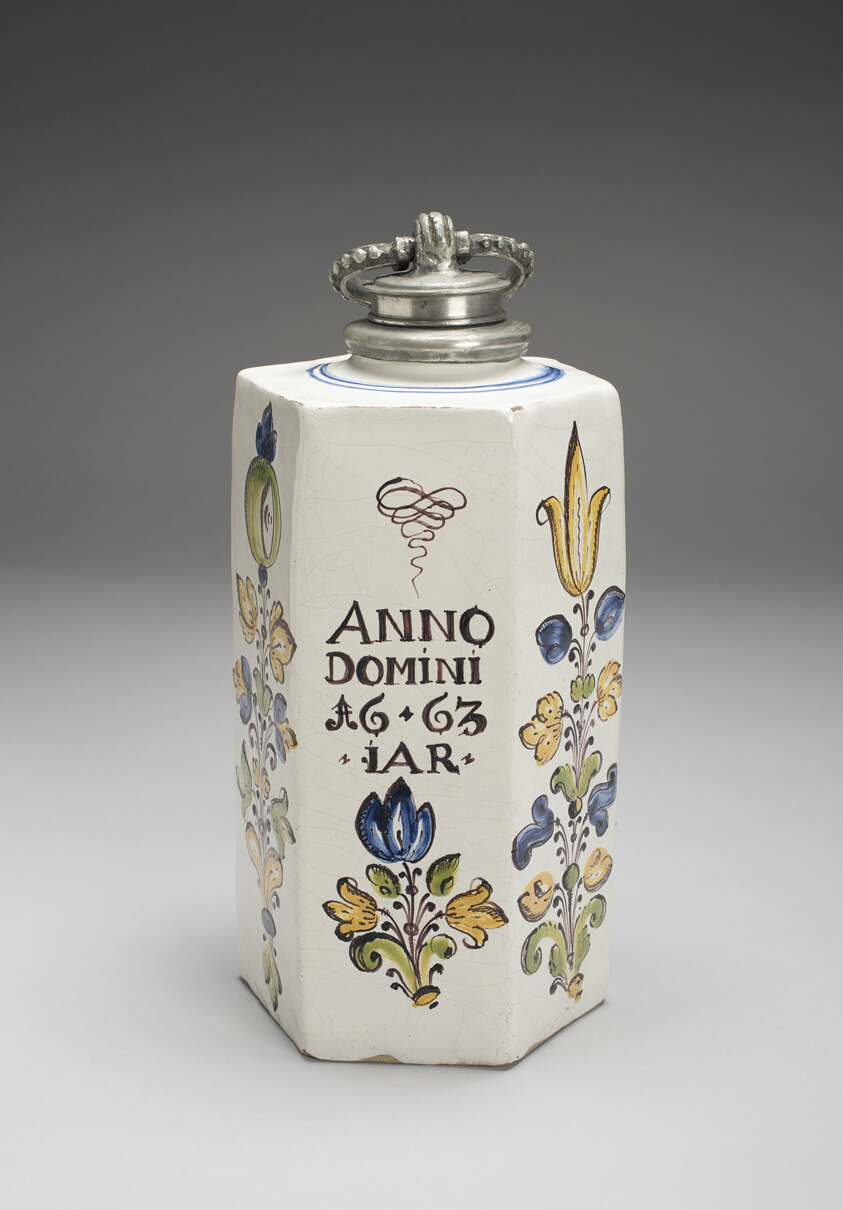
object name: Ceramics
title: Bottle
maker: Hungary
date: 1663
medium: Tin-glazed earthenware (Habaner ware) and pewter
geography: Hungary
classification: earthenware; ceramics; european decorative arts